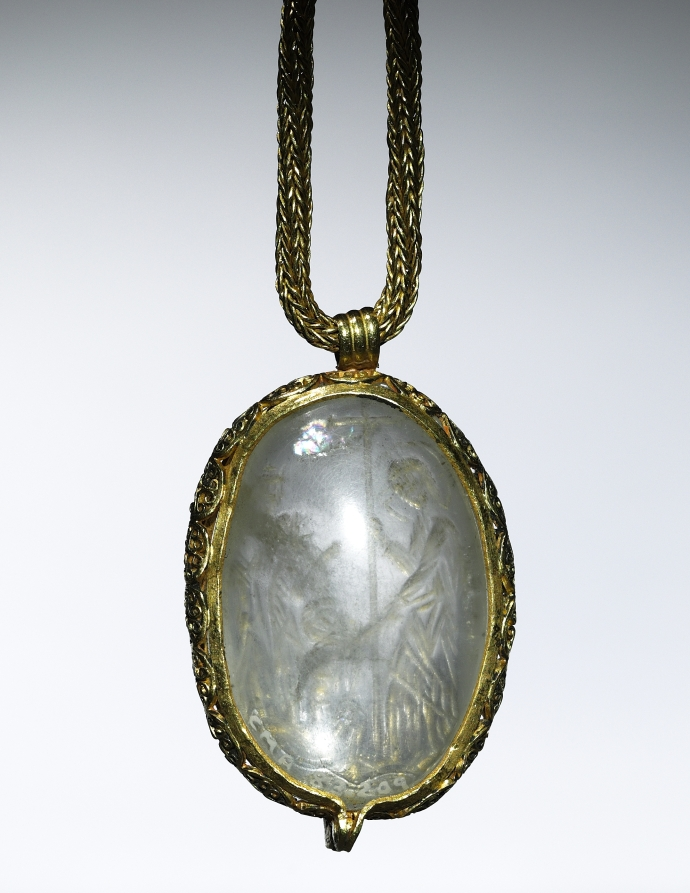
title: Pendant with Reverse Intaglio of the Anastasis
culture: Byzantium, late 6th century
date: late 500s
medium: rock crystal, with gold mount and chain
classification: Jewelry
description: This pendant consists of two dome-shaped pieces of rock crystal, one of which has the design cut into its reverse. The subject is the Anastasis, which shows Christ entering the gates of Hell and releasing Old Testament figures said to have believed in his divinity before his birth. On the left, Christ (with a cross staff) reaches out to Adam, who kneels before him. Eve stands behind, also reaching out her hand. The chain may be of later date.